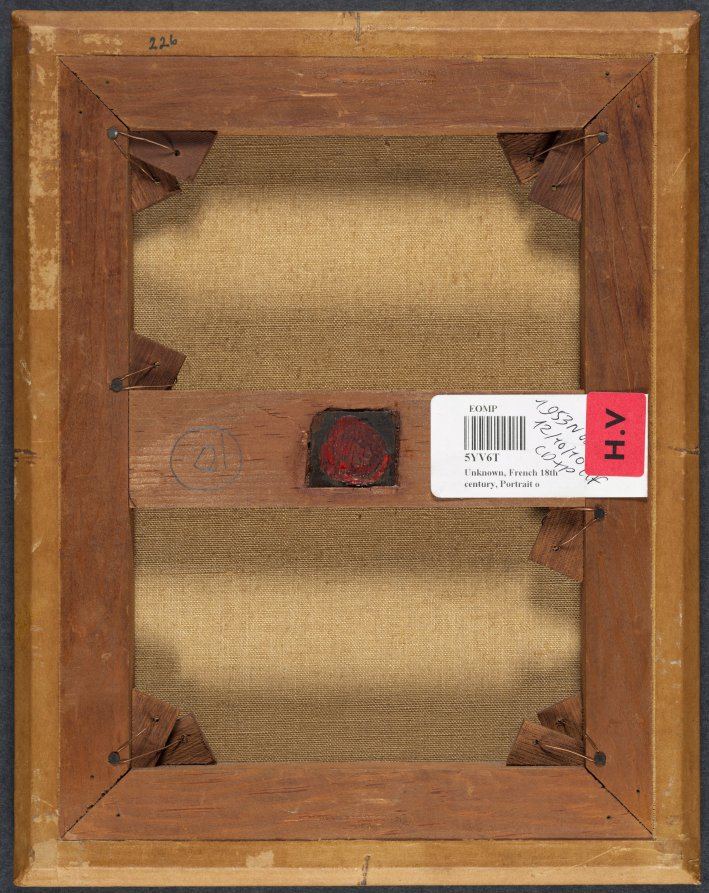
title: Head of a Young Woman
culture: France, 18th century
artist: François Boucher (French, 1703–1770)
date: early 1730s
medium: oil on canvas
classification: Painting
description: This work was catalogued as "style of Chardin" when it entered the museum's collection, and was considered a minor rococo revival work of the 1800s. In 2011, the museum asked Alastair Laing, the leading scholar of the artist Boucher, to study it. He confirmed that the painting is a rare survival from the artist's early career—one of only two known oil studies of this type by the artist.